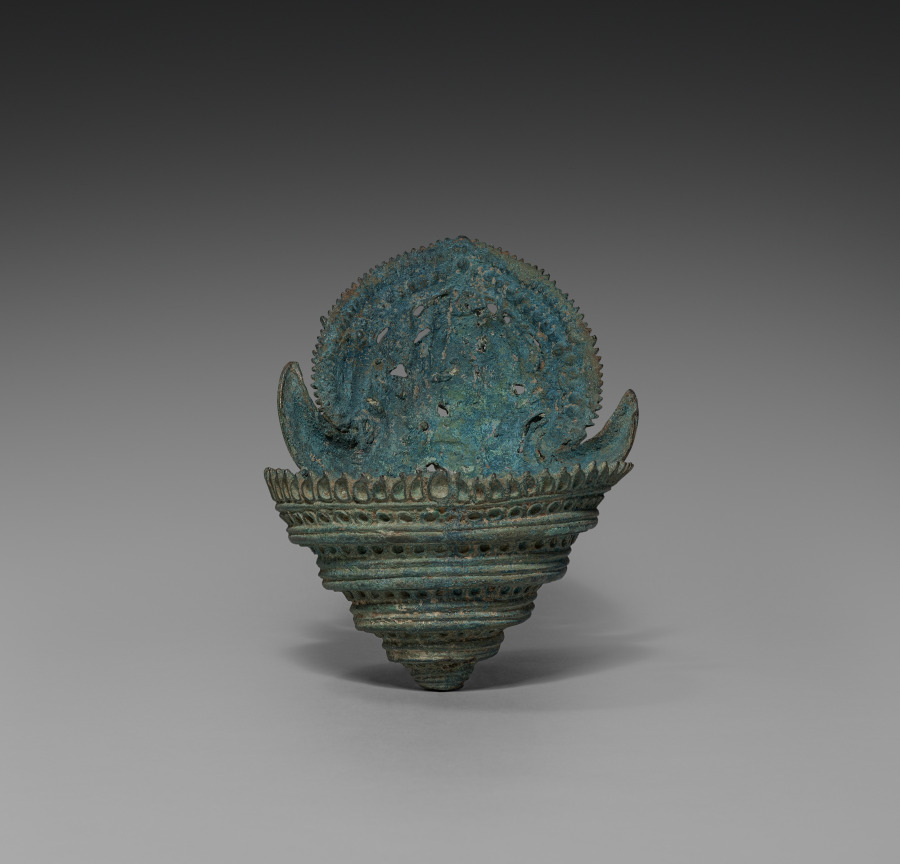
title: Ritual conch shell base with dancing Hevajra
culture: Cambodia, Khmer, Angkor Period, 12th-13th Century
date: 1100s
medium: shell and bronze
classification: Sculpture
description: A royal temple like Banteay Chhmar was built for performing rituals and to honor images of gods, Buddhas, and other sacred or enlightened beings for the sake of the kingdom’s protection and ongoing prosperity. Conch shells were blown at the start of rituals to make the sound corresponding to the syllable om. The dancing figure of Hevajra, a Buddhist being of enlightenment with eight heads, sixteen arms, and four legs, has been worked into the bronze embellishment of the shell. Hevajra was elevated to a prominent position in Khmer Buddhism of the Angkorian period as the standard figure denoting the practice of rituals prescribed in a text called the Hevajra-tantra. The tripod stand with three serpents is probably not original to the shell.